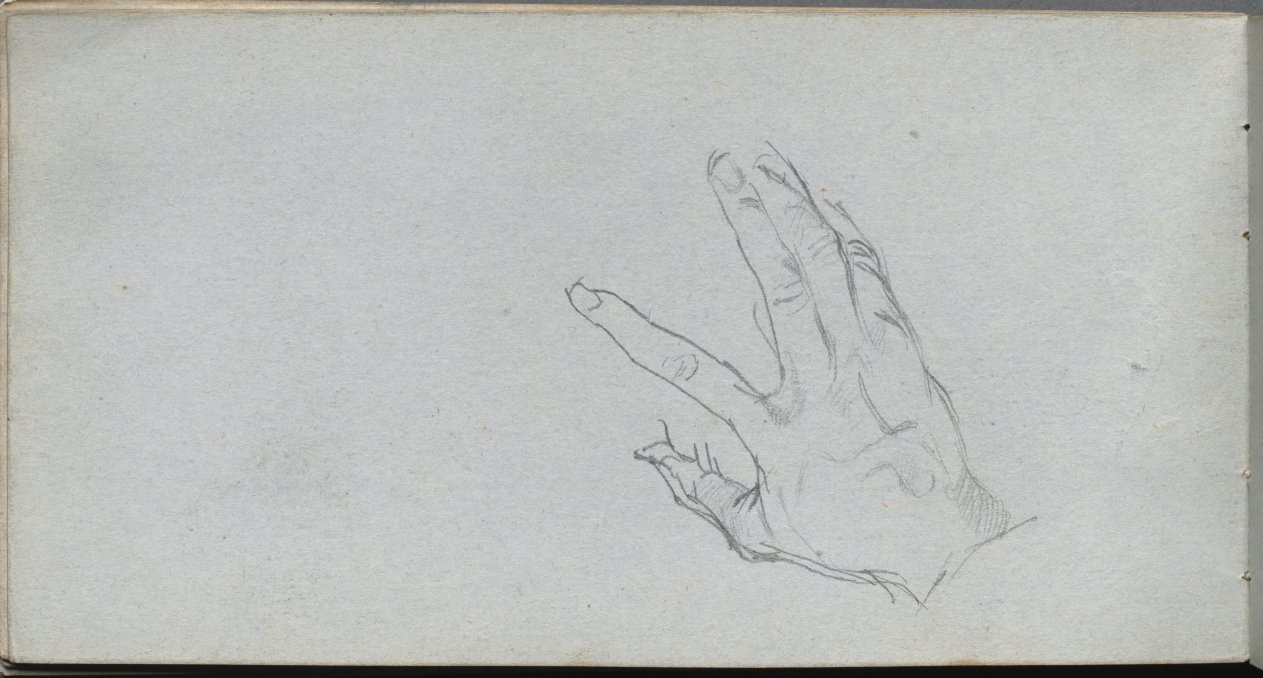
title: Sketchbook, page 68: Study of a Hand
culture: France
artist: Ernest Meissonier (French, 1815–1891)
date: c. 1860s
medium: graphite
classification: Bound Volume